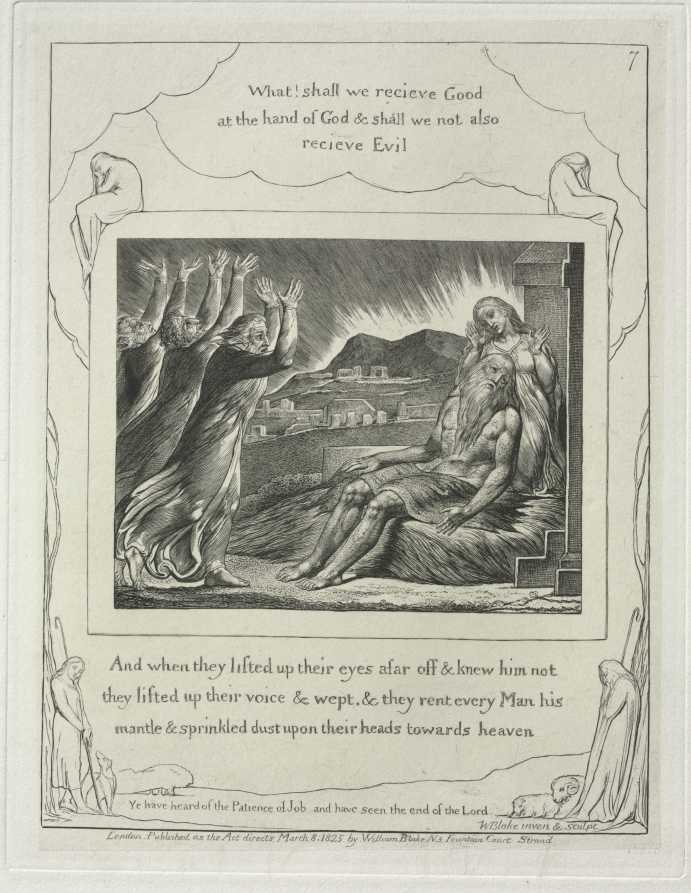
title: The Book of Job: Pl. 7, And when they had lifted up their eyes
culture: England, 19th century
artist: William Blake (British, 1757–1827)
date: 1825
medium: engraving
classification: Print